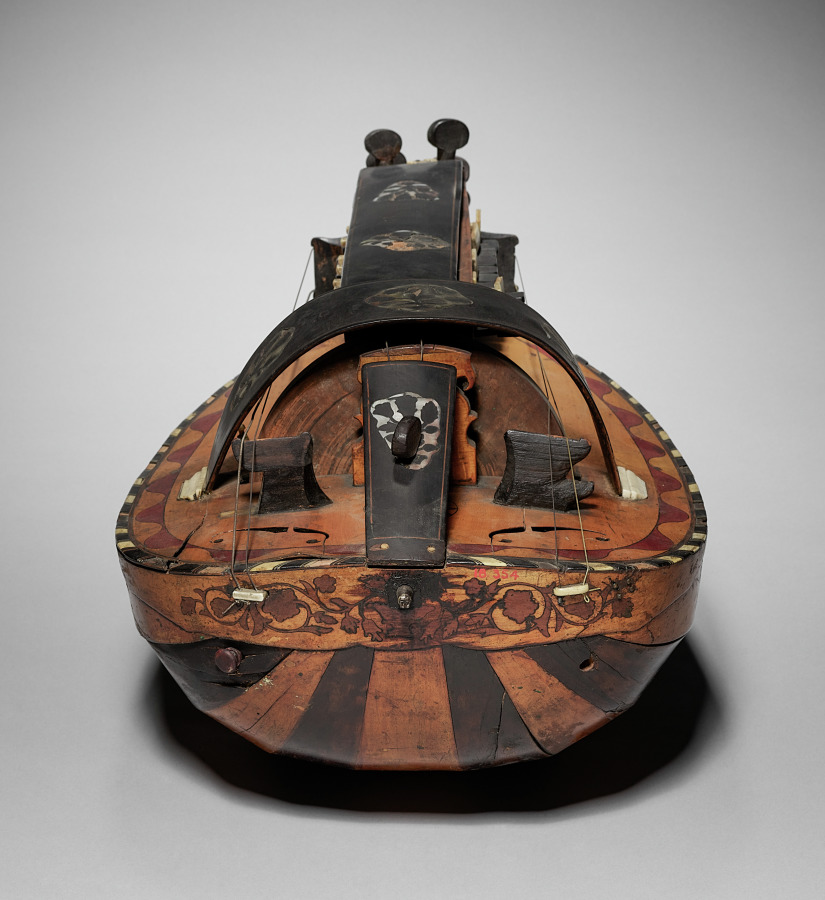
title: Vielle à roue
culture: France, 18th century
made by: Pajot of Jánzat (French)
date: 1700s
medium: wood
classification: Musical Instrument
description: The instrumentalist could play melodies on the keyboard that presses tangents against one or more strings. Often there are also multiple drone strings, which give a constant pitch accompaniment to the melody, resulting in a sound similar to that of bagpipes. This type of instrument is depicted in several artworks in the CMA collection: 1924.656, 2008.34.2, 1960.20. The vielle à roue is also related to the Swedish nyckelharpa, which was featured on the CMA performing arts series in 2017 played by Emilia Amper.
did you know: Also known as a “hurdy-gurdy” or “wheel fiddle,” this instrument produces sound by a hand crank-turned rosined wheel rubbing against the strings.